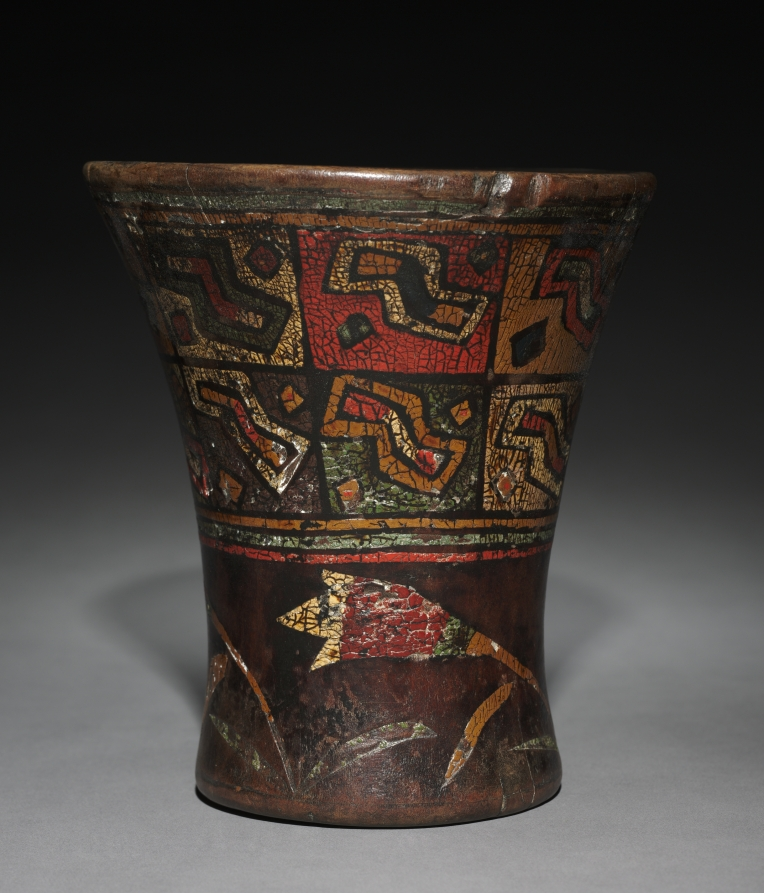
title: Kero (Waisted Cup)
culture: Peru, Colonial Inka style, 16th century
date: after 1550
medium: wood, inlaid pigments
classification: Wood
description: Keros, used to drink the maize beer chicha, were essential items of Inka statecraft. Made and used in pairs, they reflect the important Andean concept of reciprocity. Native use of keros continued in the colonial period, the date of these two examples, which come from separate pairs. The example with geometric motifs is closest to pre-conquest models. On the second, two armies converge: the Inka, dressed in tunics with waistbands, and their opponents, perhaps jungle people whose body parts are heaped in a centerpiece.